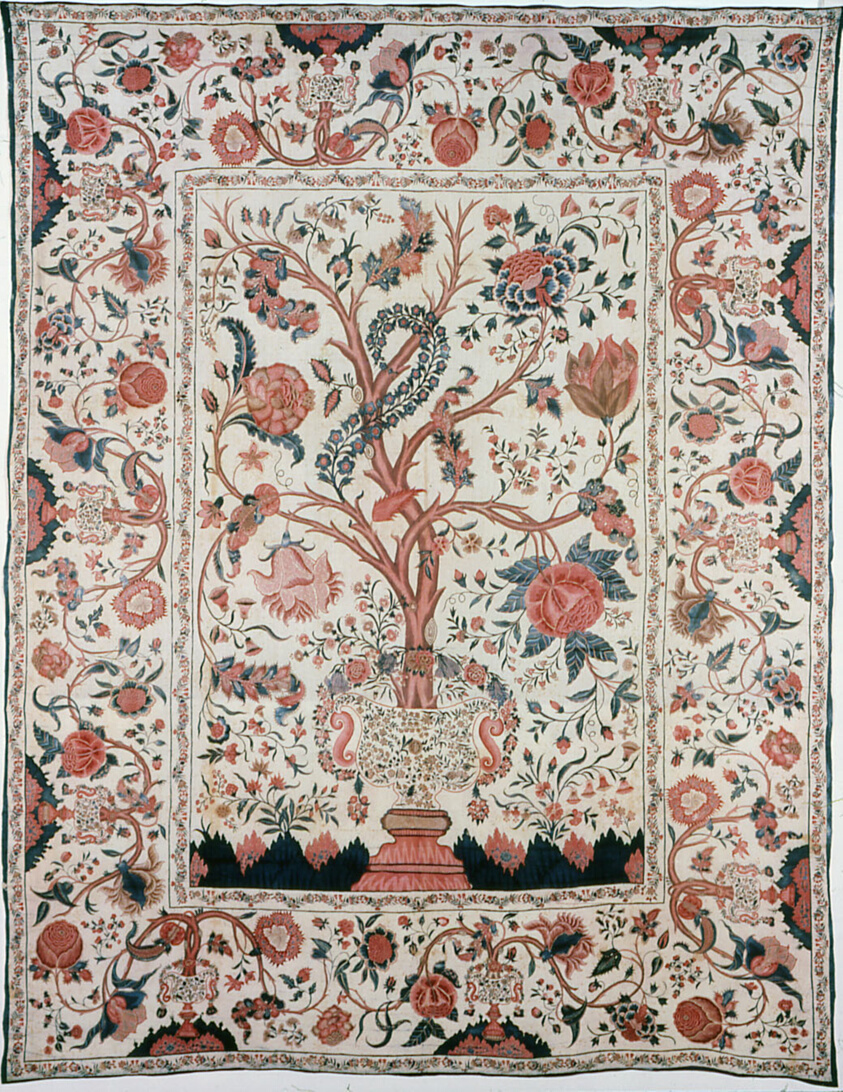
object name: Textile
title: Palampore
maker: Eastern India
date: 18th century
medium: Cotton, printed; painted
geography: India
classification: textile; weaving - printed; weaving